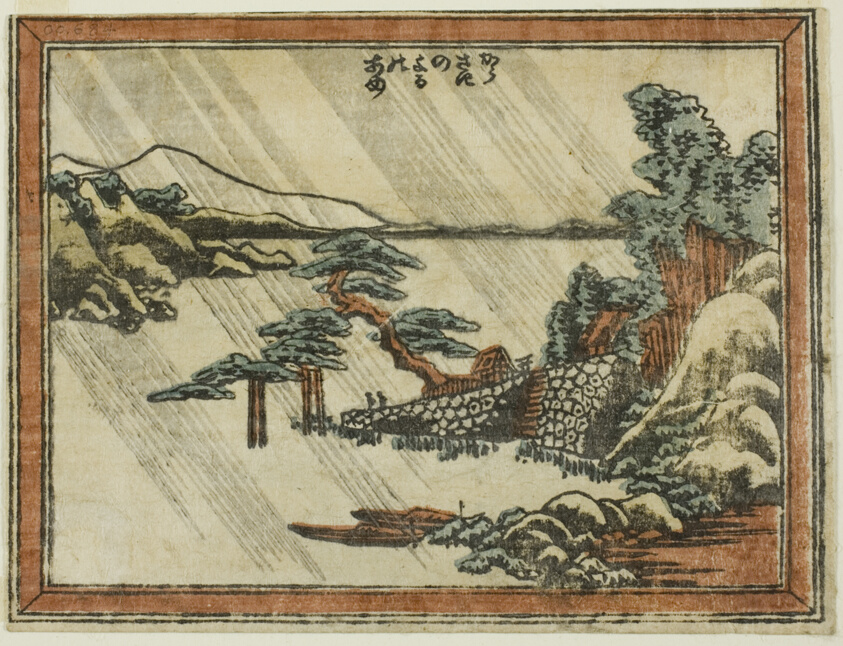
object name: Print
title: Night Rain at Karasaki (Karasaki no yoru no ame), from the series Eight Views of Omi in Etching Style (Doban Omi hakkei)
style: Japanese (culture or style)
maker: Katsushika Hokusai 葛飾 北斎; Japanese, 1760-1849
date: 1804/16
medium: Color woodblock print; horizontal koban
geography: Japan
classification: woodblock print; print; asian art